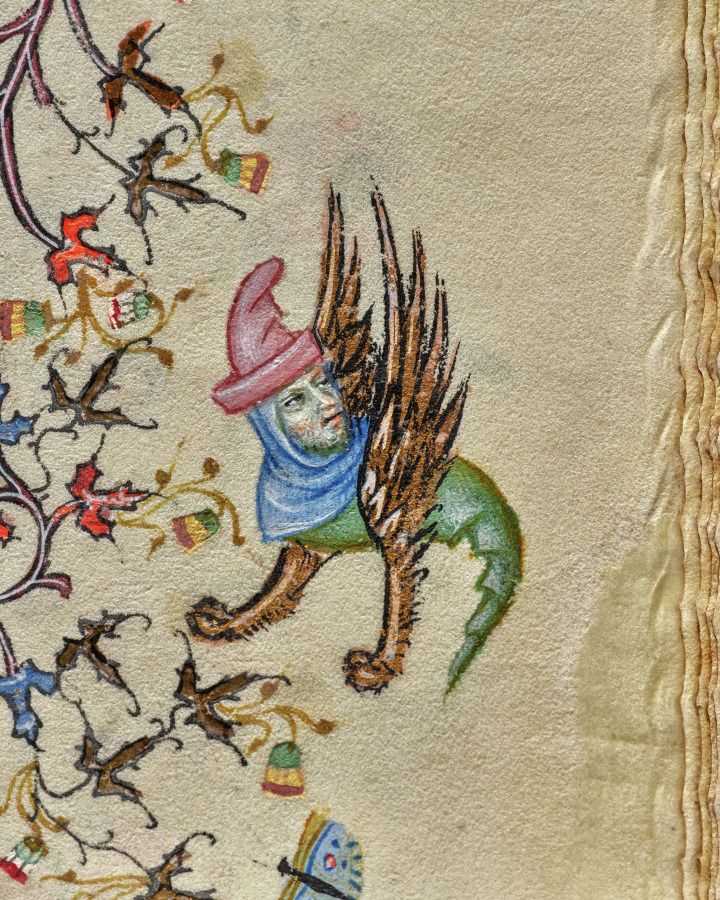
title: Hours of Charles the Noble, King of Navarre (1361-1425): fol. 283r, St. Lazarus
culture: France, Paris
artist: Master of the Brussels Initials and Associates (French)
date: c. 1405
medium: ink, tempera, and gold on vellum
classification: Bound Volume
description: This precious volume was obviously highly prized by its owner, the French-born King of Navarre, who had his coat of arms painted on no less than twenty folios. Rather than directly commissioning this manuscript from a specific workshop, it seems that Charles the Noble acquired his book of hours -- perhaps ready-made for the luxury market -- while on a trip to Paris in 1404-05. A collaborative effort, six painting styles are evidenced within the pages of this codex, those of two Italians, two Frenchmen, and two Netherlanders. The painter who was responsible for the planning and decoration of the book, and who produced seventeen of the large miniatures, was a Bolognese artist known as the Master of the Brussels Initials. His principal assistant, responsible for most of the borders, was a Florentine who signed his name "Zecho" da Firenze on folio 208 verso.